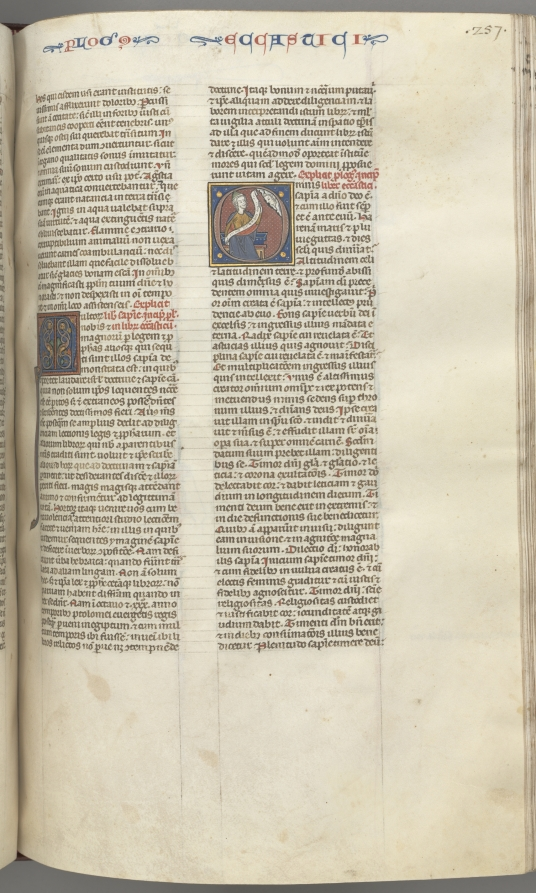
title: Fol. 257r, Ecclesiasticus, historiated initial O, Sirach seated with a scroll, bust of God above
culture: Southern France, Toulouse(?), 13th century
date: c. 1275–1300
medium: ink, tempera and gold on vellum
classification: Bound Volume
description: Biblical manuscripts were highly prized and important possessions of churches, monasteries, cathedral schools, and universities throughout medieval Europe. The biblical texts were known as the vulgate, the translations made by Saint Jerome in the fourth century from Hebrew and Greek into Latin, which became the definitive and official Latin version of the Roman Church. In the 13th century, the bible was, for the first time, produced as a single volume with an officially sanctioned sequence to its books and chapters as illustrated by this example. The very extensive decoration of this bible is arranged hierarchically to indicate the relative importance of the various texts so that full or almost full-page initials mark the openings of the first prologue, Genesis, and the first Gospel; historiated initials mark the beginning of each book and illuminated initials mark the Prologues.